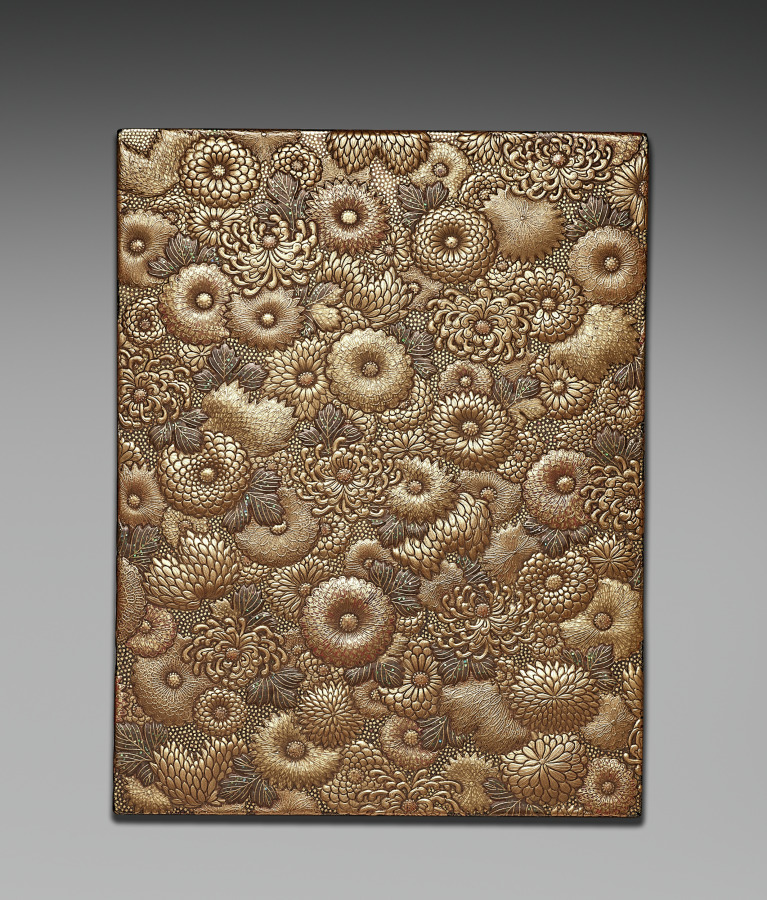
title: Nested Boxes with Chrysanthemums (outer box lid)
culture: Japan, Meiji period (1868–1912)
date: early 1900s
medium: lacquer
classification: Lacquer